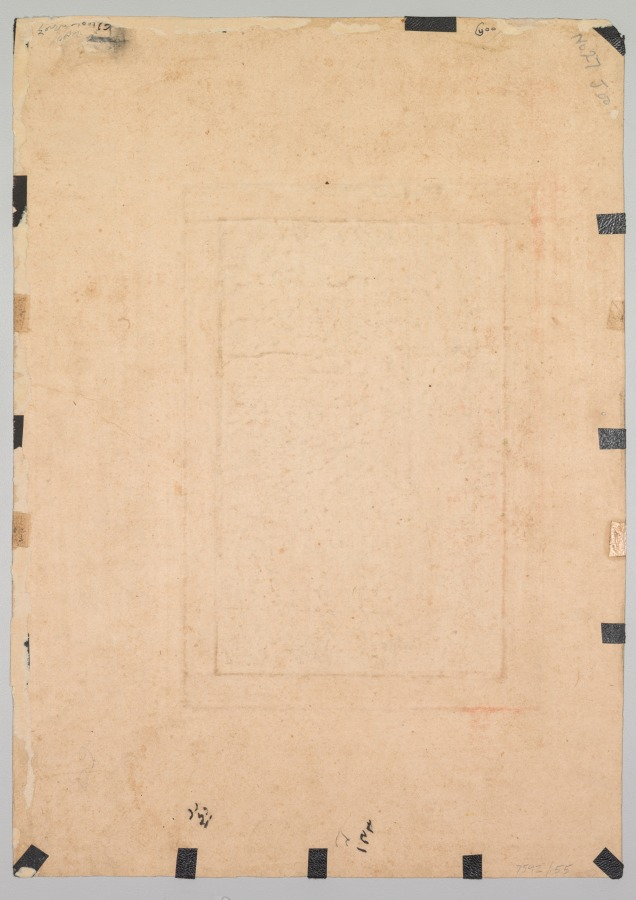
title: A floral fantasy of animals and birds (Waq-waq)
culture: Mughal India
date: early 1600s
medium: Gum tempera and gold on paper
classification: Painting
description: A magical plant simultaneously brings forth and eats animal life in multiple forms. Playfully rendered, real and mythic creatures ripen on the vine. All stems issue from the elephant, who is about to eat the main branch, while he, in turn, emerges from one that is about to be cut by the teeth of an ibex at the lower right. This painting would have beguiled courtly connoisseurs who enjoyed discovering visual puns in a royal album. Learned viewers would note that an animal-bearing plant recalls medieval Persian stories about the mythical island of Waq-waq, inhabited by half-plant/half-animal creatures.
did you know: The dragon threatens to singe the boar’s beard.